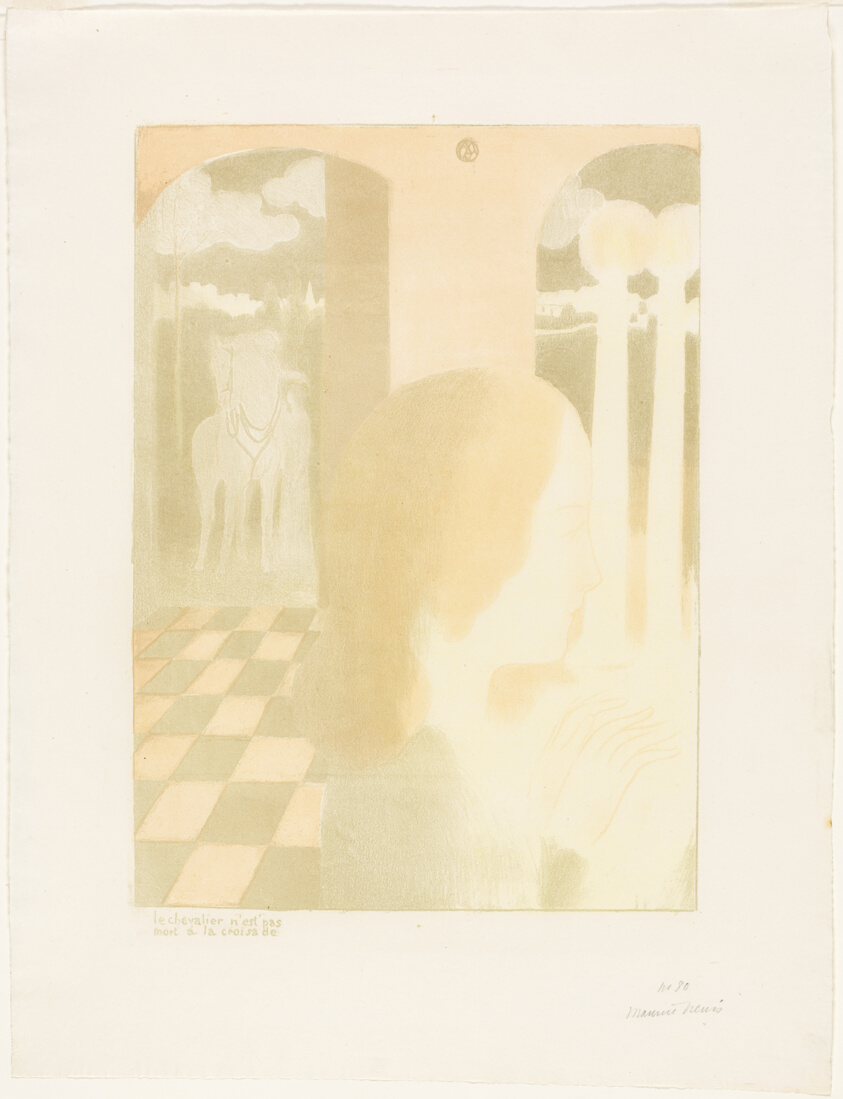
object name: Print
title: The Knight Did Not Die at the Crusade, plate five from Love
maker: Maurice Denis (French, 1870-1943); published by Ambroise Vollard (French, 1867-1939)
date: 1898, published 1899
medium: Lithograph in peach, pale green, and yellow on light ivory wove paper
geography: France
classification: lithograph; print; prints and drawing